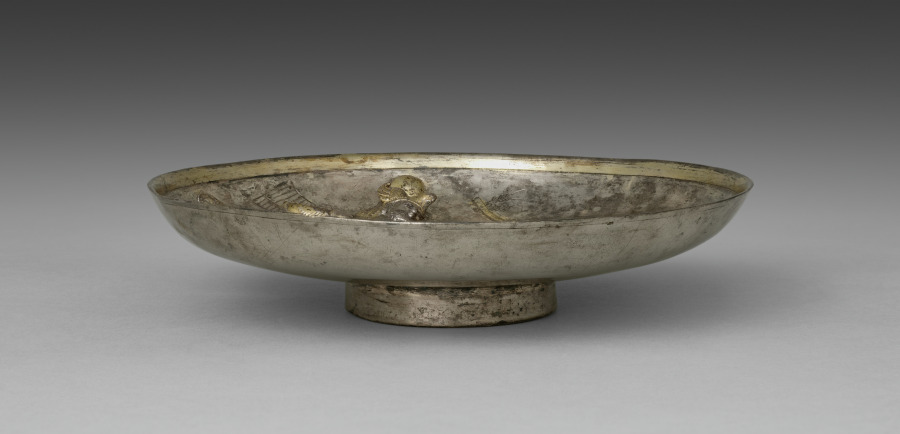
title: Dish with King Hormizd II or Hormizd III Hunting Lions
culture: Iran, Sasanian Empire (224–651 CE)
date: 400–600 CE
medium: silver gilt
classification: Metalwork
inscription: On reverse, inside foot, an inscription in Pahlavi reads according to Dr. Frye, Harvard University: "Gozac, one pound (fifty) one drachms."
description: Lion hunting was a traditional royal sport in ancient Near Eastern cultures and was frequently incorporated into artwork, such as Assyrian (about 912–612 BCE) palace reliefs. Thematically, depictions of the hunt in royal artwork bridge the pre- and post-Islamic worlds. This dish features the Sasanian ruler Hormizd II (reigned 303–309 CE), identifiable by his distinctive crown. The style of the king’s and horse’s equipment suggest that this dish was made long after he died, perhaps as a commemorative work by a much later successor, Hormizd III (reigned 457–459 CE).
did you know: Hormizd II's crown is distinct with its eagle form and topped with the traditional korymbos, a fine, bejeweled fabric that encases the top hair in a globelike fashion.